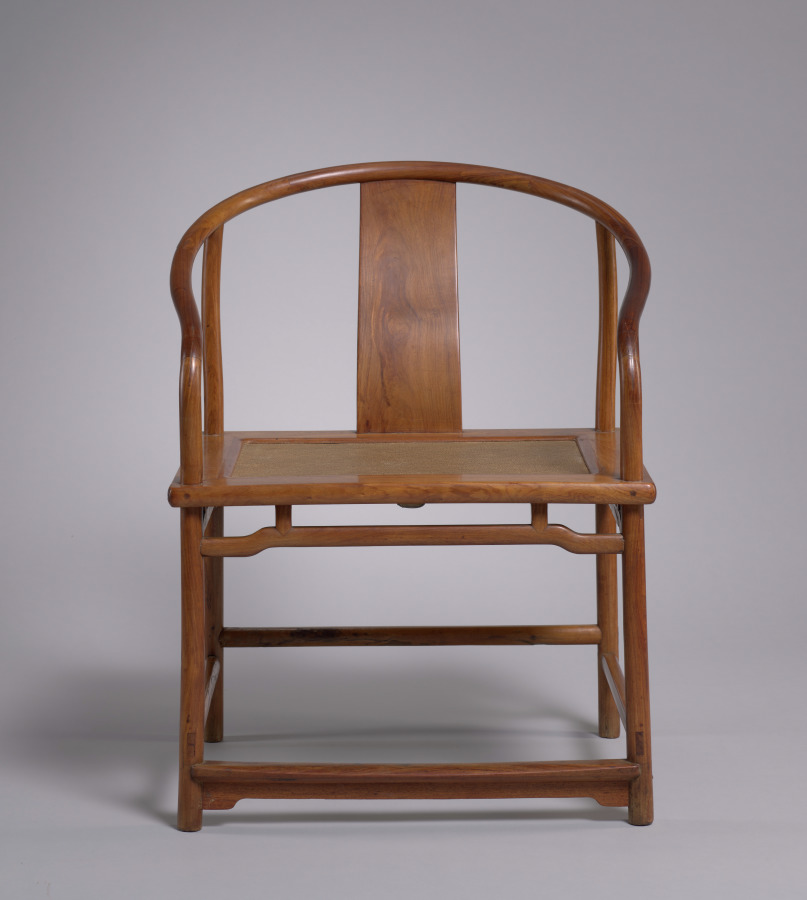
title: Roundback Armchair: Lohan Type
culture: China, Jiangsu province, Ming dynasty (1368–1644) or Qing dynasty (1644–1911)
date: 1600s–1700s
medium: Rosewood (huanghuali)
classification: Furniture and woodwork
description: In history, China moved from an original floor culture to high chairs and tables, developing a unique tradition of craftsmanship. Although still relatively unexplored, the manufacturing and styles of furniture differ by region. This horseshoe-back armchair was made in Jiangsu province. Its simplicity and minimalist elegance is characteristic of Suzhou-style furniture and aesthetics. The back of the chair is made of seven pieces of wood, joined and secured with an inserted wooden pin, a mortise-tenon technique that appeared in its earliest form in Neolithic fragments of the Hemudu culture.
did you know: Similar chairs with low, straight backs were presumably used by women or in a less formal context.